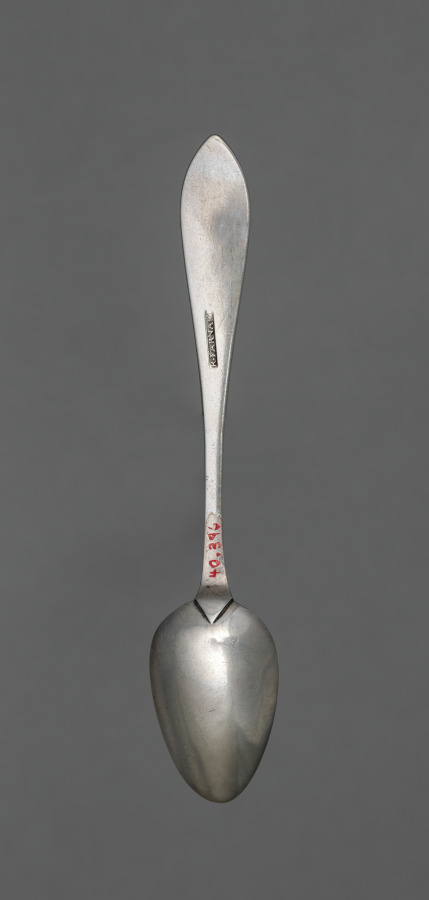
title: Teaspoon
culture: America, Massachusetts, Boston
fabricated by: Rufus Farnam (American, 1771-)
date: c. 1790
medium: silver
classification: Silver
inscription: engraved "SG" in block letters within reserve on top of handle end.